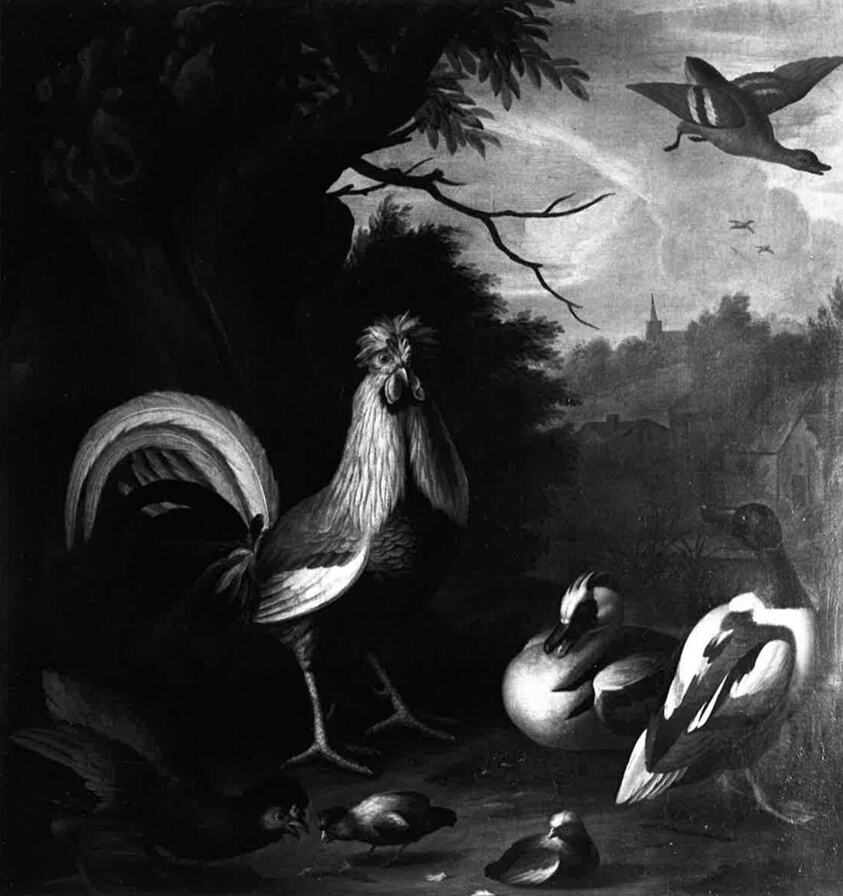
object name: Painting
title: Birds in Landscape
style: 17th Century, 18th Century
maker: Marmaduke Cradock (English, c. 1660-1717)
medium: Oil on canvas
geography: England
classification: painting; british; oil on canvas; paint; oil paintings (visual works); european painting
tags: birds, animals, buildings, ducks, English, landscape, roosters, trees